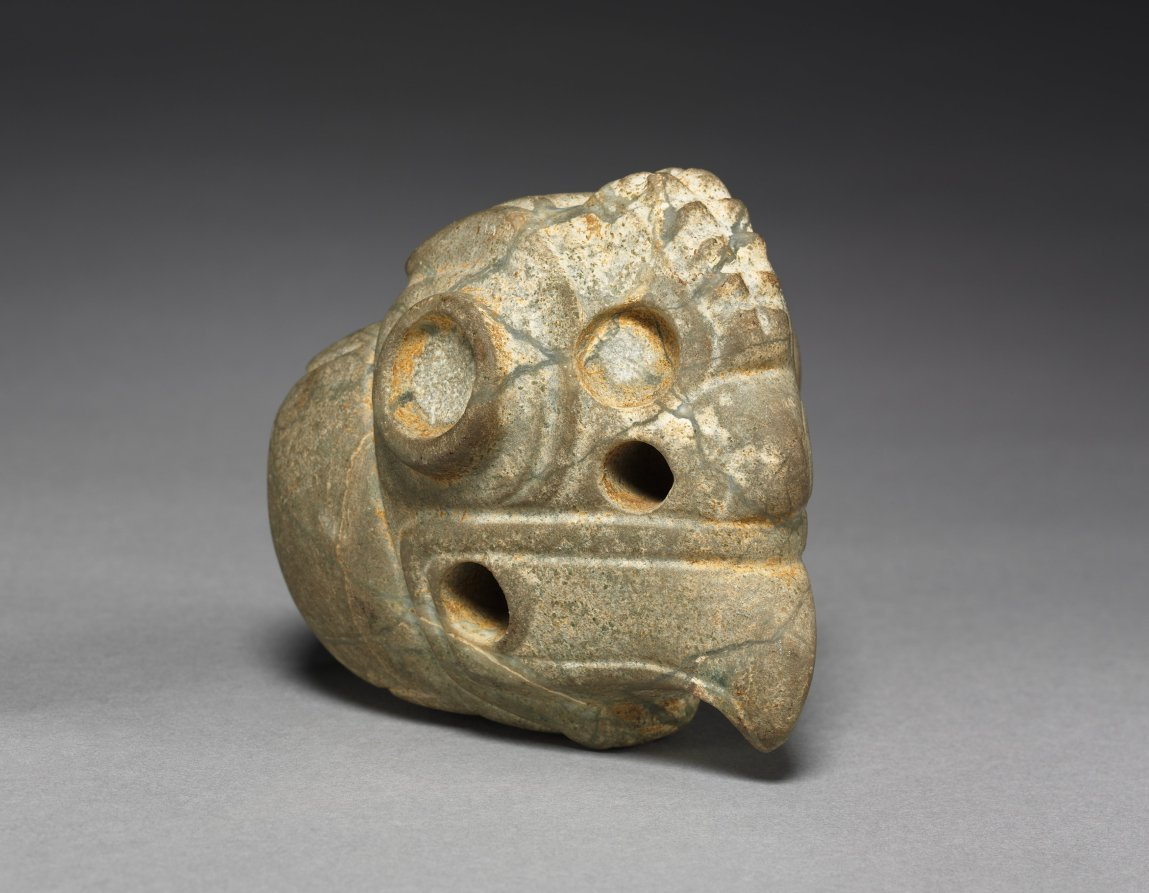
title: Ceremonial Mace (Club) Head: Bird (Male Curassow?)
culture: Costa Rica, Southern Nicoya region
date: 300 BCE–600 CE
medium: stone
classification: Sculpture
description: Probably once mounted on wooden shafts, these objects could have served as symbols of chiefly authority, group insignia, the heads of ceremonial weapons, or all three. They eventually were placed in elite graves. The bird may be a male curassow and the feline, a jaguar.